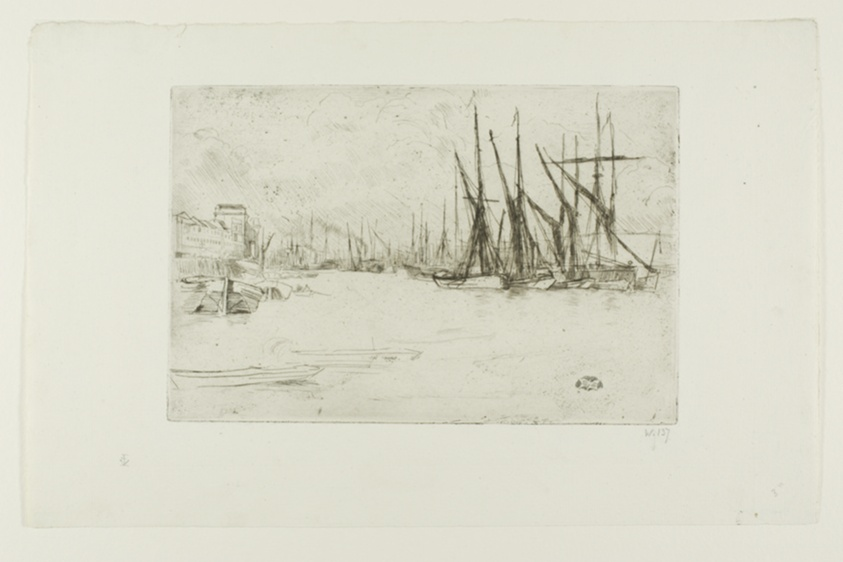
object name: Print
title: Pickle Herring Wharf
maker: James McNeill Whistler (American, 1834-1903)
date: 1876/77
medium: Etching and drypoint with foul biting in black ink on off-white laid paper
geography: United States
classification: etching; drypoint; foul biting; print; prints and drawing; paper